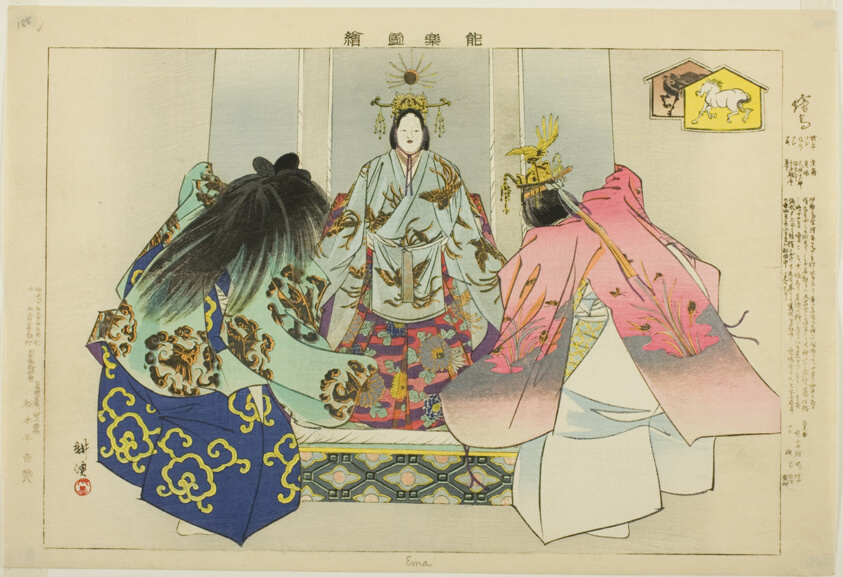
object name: Print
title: Ema, from the series "Pictures of No Performances (Nogaku Zue)"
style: Japanese (culture or style)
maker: Tsukioka Kogyo; Japanese, 1869-1927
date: 1898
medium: Color woodblock print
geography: Japan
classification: woodblock print; print; asian art